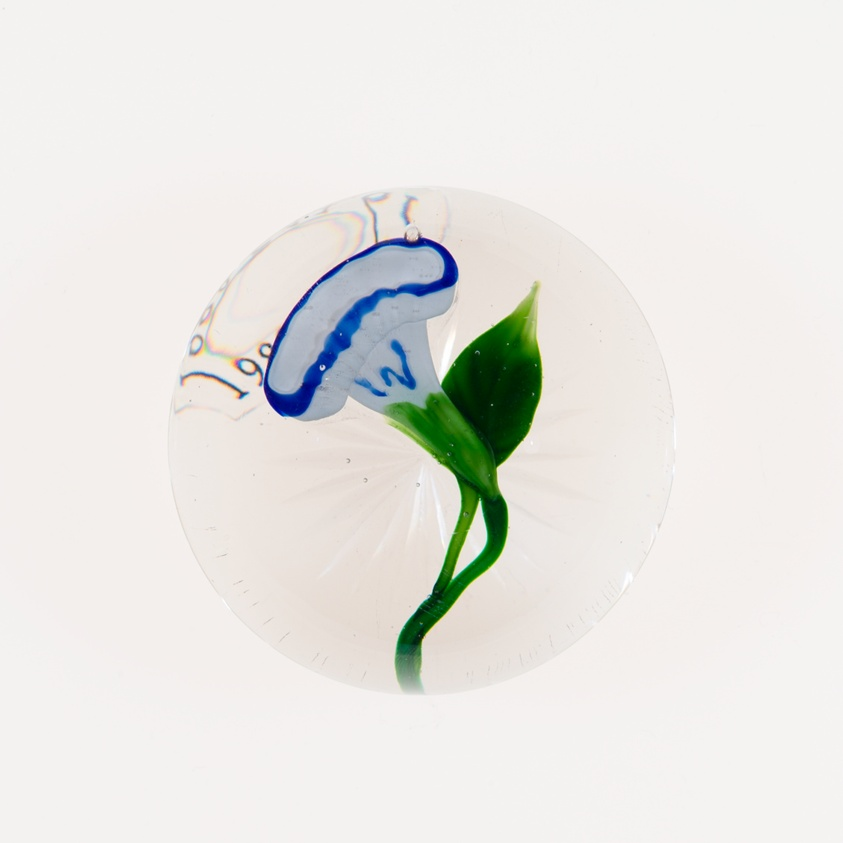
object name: Glass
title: Paperweight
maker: Clichy Glassworks (Cristalleries de Clichy); Clichy, France, 1837-1885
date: c. 1845/60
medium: Glass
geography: France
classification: paperweight; glass